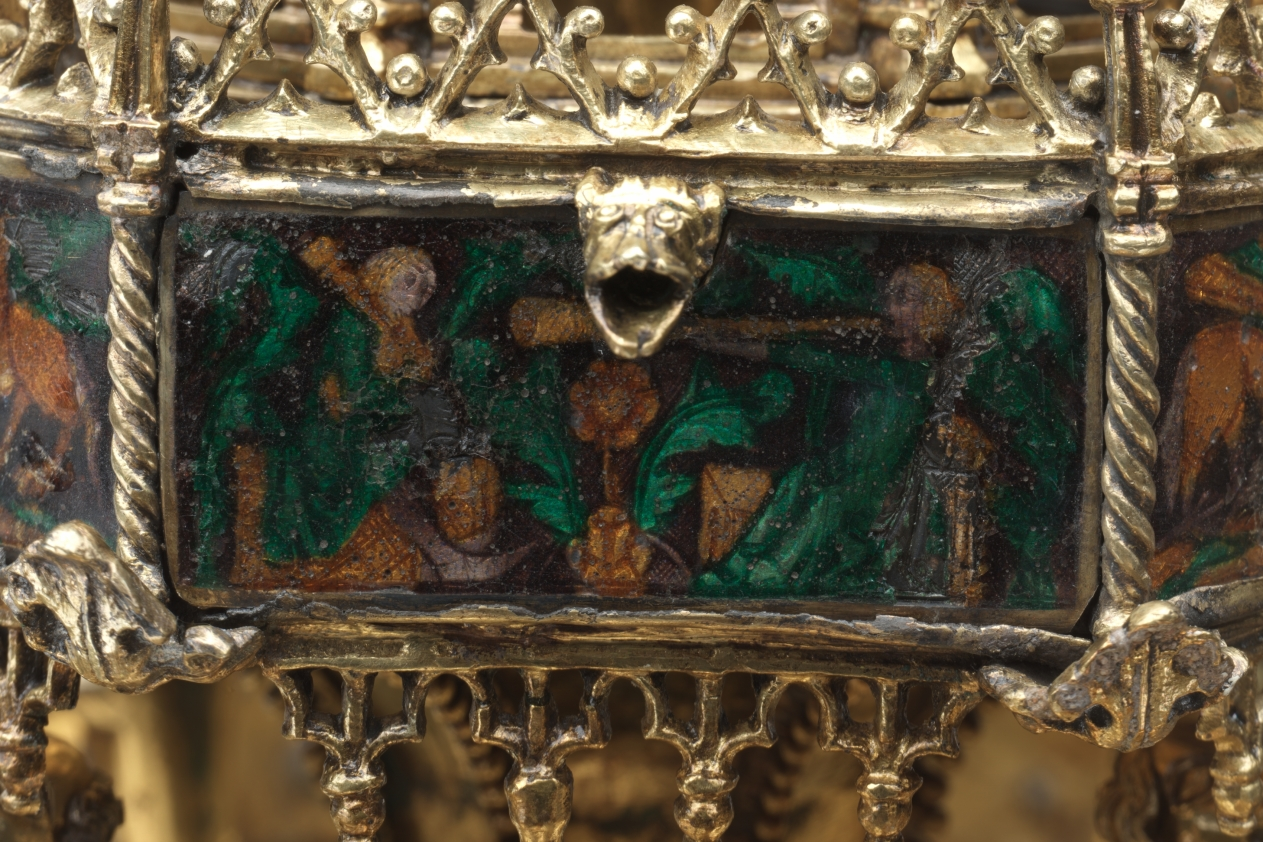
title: Table Fountain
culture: France, Paris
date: c. 1320–40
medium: gilt-silver and translucent enamels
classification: Metalwork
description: Conceptually and stylistically, this object is beyond all else a piece of Gothic architecture in miniature with vaults, pinnacles, columns, and traceried arches. Though the artist who created it is unknown, he was unquestionably inspired by the great Gothic buildings of his time. The table fountain is a three-tiered assembly combining cast elements with bent sheets of gilt-silver. To these have been attached a series of enamel plaques representing grotesque figures, some of which play musical instruments. Water wheels and bells were added to capture motion and sound. The rich detail, precious materials, and involved ornamentation of this deluxe object suggest it would have been expensive to produce and highly treasured by its original owner, someone of high status, and would have been deployed as an object of spectacle. This is the most complete example of its type known to survive from the Middle Ages. Medieval inventories reveal that small fountains like this, often taking various forms, and generally made from precious metals, once existed in large numbers, thus making the Cleveland table fountain an extremely rare object.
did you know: This fountain with its minute architectural details and finely made enamel plaques displayed the wealth and refinement of the owner as it entertained his guests. Imagine hearing the ringing of the tiny bells when this fountain was in use.